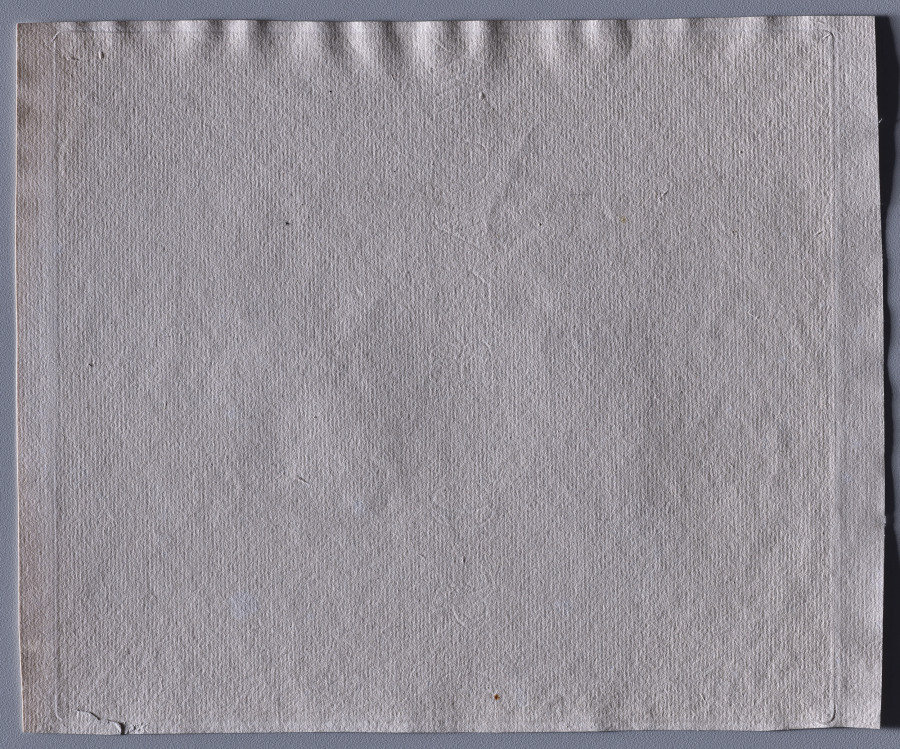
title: Untitled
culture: France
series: L'Assommoir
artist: Gaston de Latouche (French, 1854–1913)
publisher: Cadart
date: 1879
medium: drypoint on laid paper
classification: Print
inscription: Signed, in plate, at lower left: Gaston La Touche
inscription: Watermark: D.C. BLAUW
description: Although his work changed throughout his career, early on Gaston de Latouche belonged loosely to the Impressionist circle through his association with Édouard Manet. Latouche explored subjects—such as that seen here—taken from the lives of working-class Parisians. This print represents a scene from naturalist author Émile Zola’s novel L’Assommoir, which detailed the rise and fall of a laundress named Gervaise. Latouche is said to have collaborated with the author on the imagery and exhibited the entire series at the public Paris Salon in 1879.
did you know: Gaston de LaTouche completely changed the subjects and style of his work around 1890 and destroyed much of his early work.